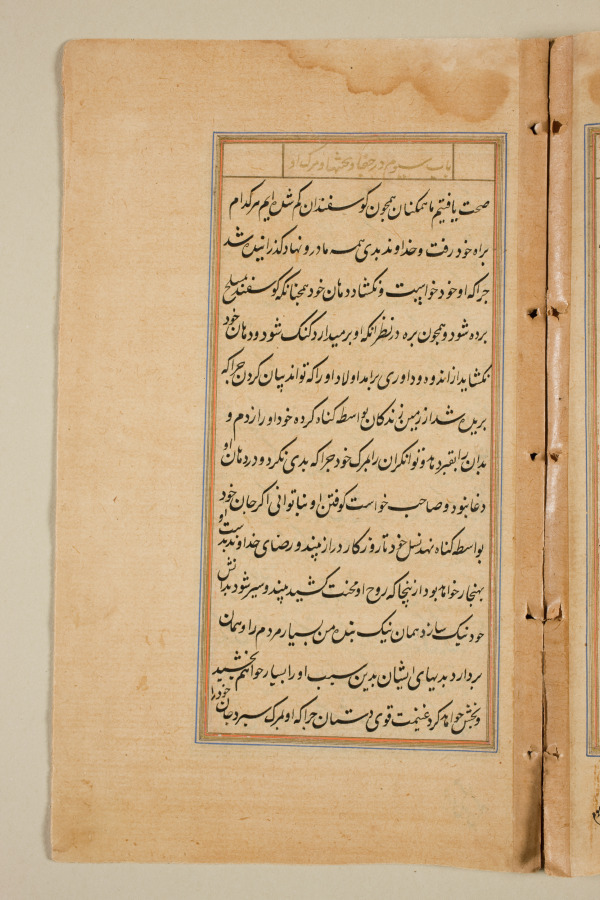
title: Text page from a Mirror of Holiness (Mir’at al-quds) of Father Jerome Xavier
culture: Mughal India, Allahabad, made for Prince Salim (1569–1627)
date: 1602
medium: Ink and gold on paper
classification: Manuscript